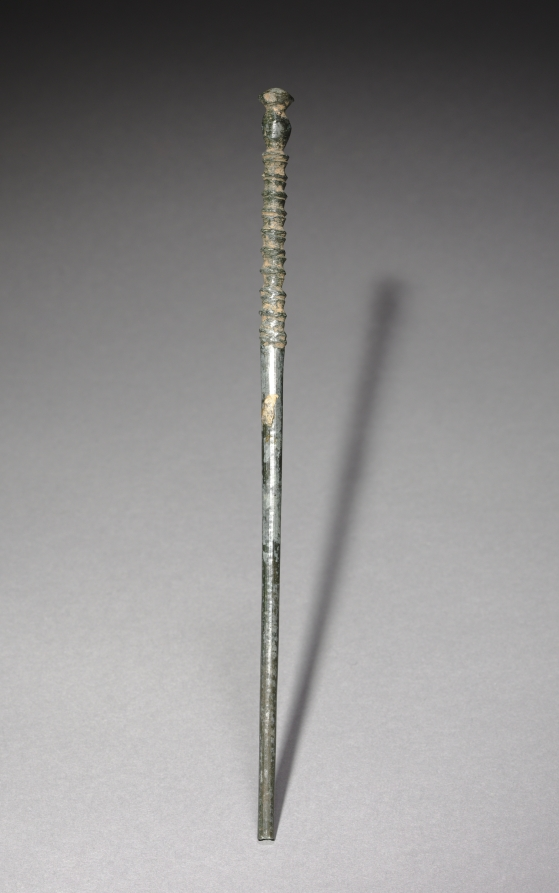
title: Chopstick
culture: Korea, Goryeo dynasty (918–1392)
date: 918–1392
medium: bronze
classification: Metalwork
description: In Korea, chopsticks made of metal such as brass, silver, and gold were excavated from ancient tombs and ruins dated to the 6th century at the earliest. Burial goods often include utilitarian objects such as table wares and utensils because the dead were believed to need them in the afterlife.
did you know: In contrast to the Chinese and Japanese, Koreans still prefer metal chopsticks (stainless steel and brass) to wooden ones.